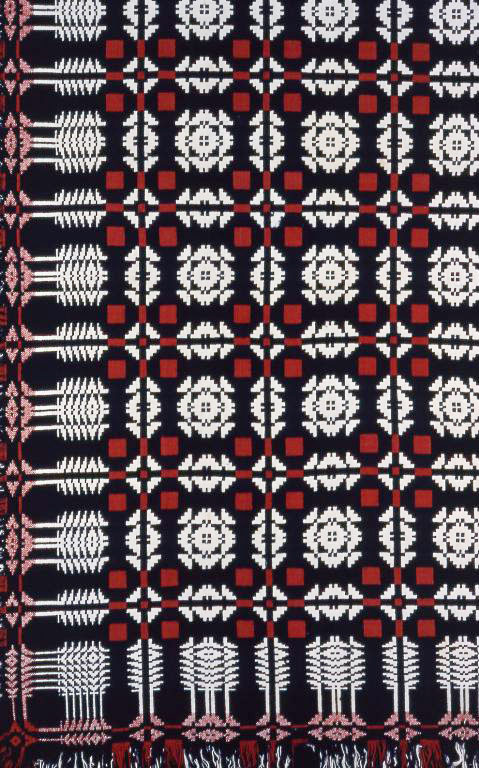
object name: Textile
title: Coverlet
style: 19th century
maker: Attributed to Mrs. Woodcock (American); United States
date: c. 1840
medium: Cotton and wool, plain weave double cloth; woven on loom with Jacquard attachment; two loom widths joined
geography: United States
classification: weaving - coverlet; coverlet; weaving; textile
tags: geometric motif, geometric, squares, coverlet